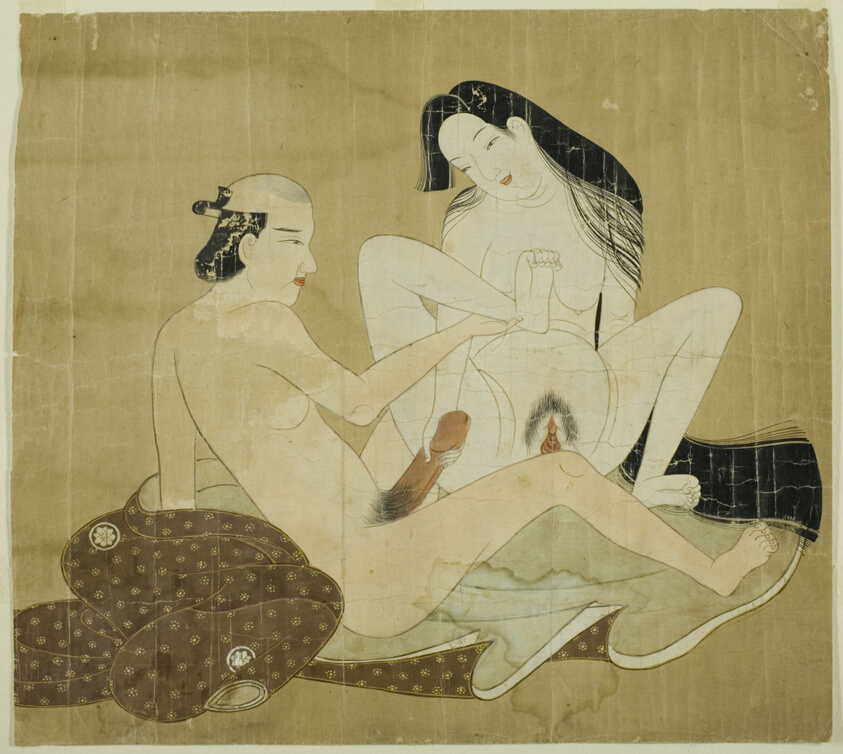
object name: Print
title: Two Lovers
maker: Unknown Artist (Japanese, date unknown)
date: 18th century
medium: Color woodblock print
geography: Japan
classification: ink or chalk wash; painting; asian art